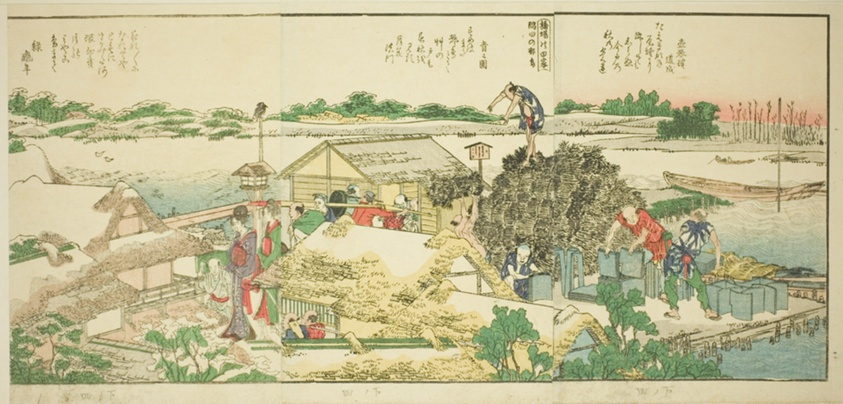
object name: Print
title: Pages from the illustrated book "Panoramic Views along the Banks of the Sumida River (Ehon Sumidagawa ryogan ichiran)"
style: Japanese (culture or style)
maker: Katsushika Hokusai 葛飾 北斎; Japanese, 1760-1849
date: 1801, 1804, or 1806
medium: Color woodblock print; 3 pages from illustrated book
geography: Japan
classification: woodblock print; print; asian art